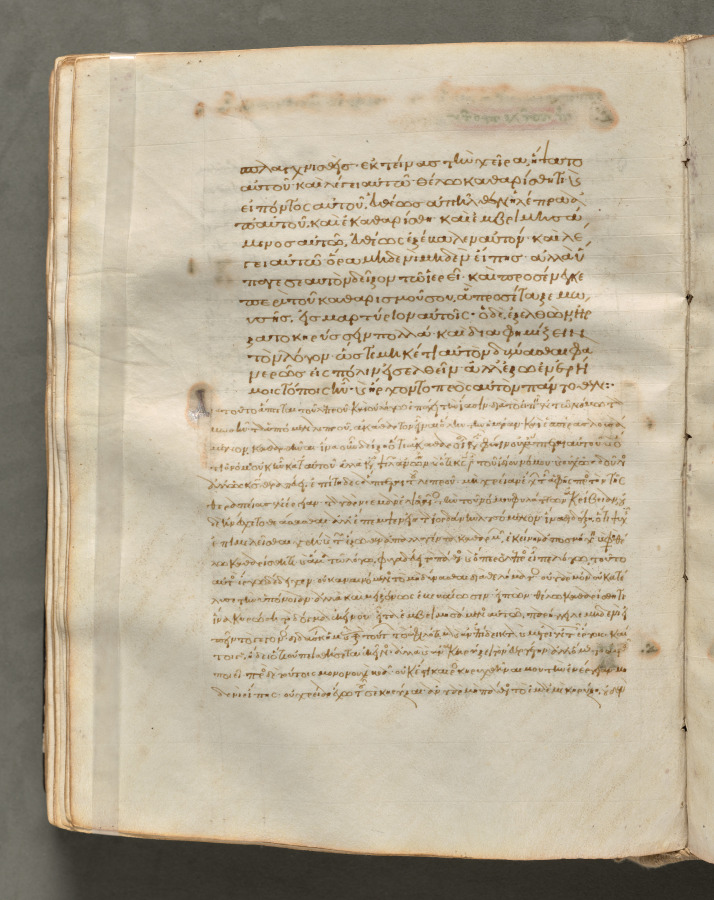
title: Text, folio 136 (verso), from a Gospel Book with Commentaries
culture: Byzantium, Constantinople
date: c. 1000–1100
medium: ink, tempera, and gold on vellum; leather binding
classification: Bound Volume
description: Each of the four gospels in this book opens on a page with brilliantly illuminated borders depicting the author of the text as well as birds-principally peacocks, symbols of the immortality of the soul-and fountains, representing the fountain of life and the salvation of the soul. This volume consists of 428 leaves with texts in Greek. Its level of sophistication suggests that it was probably written and decorated in a monastery in Constantinople.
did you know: Gospel Books were carried in procession through Byzantine churches.